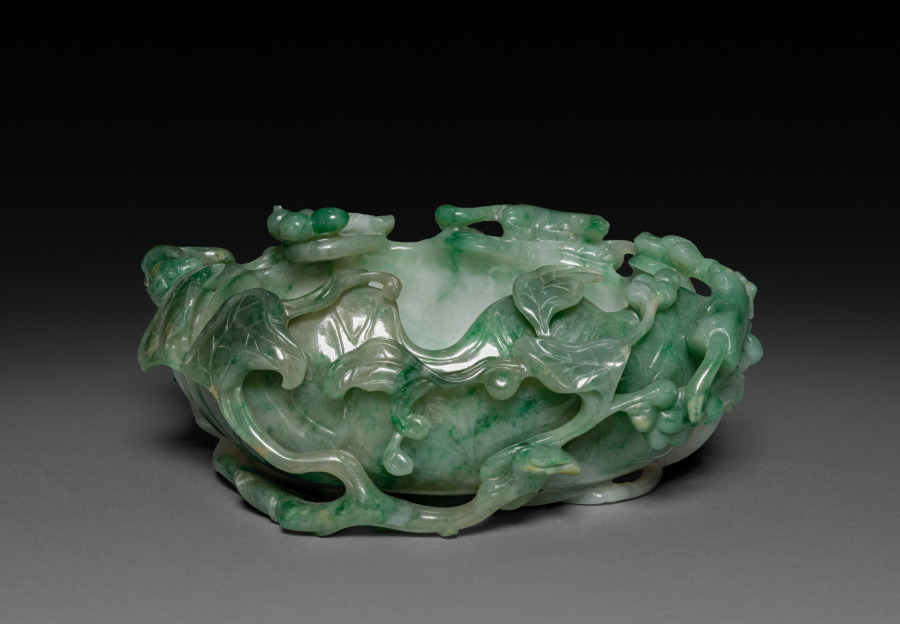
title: Brushwasher in Shape of Lotus Leaf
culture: China, Qing dynasty (1644-1911)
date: 19th Century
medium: translucent jadeite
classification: Jade